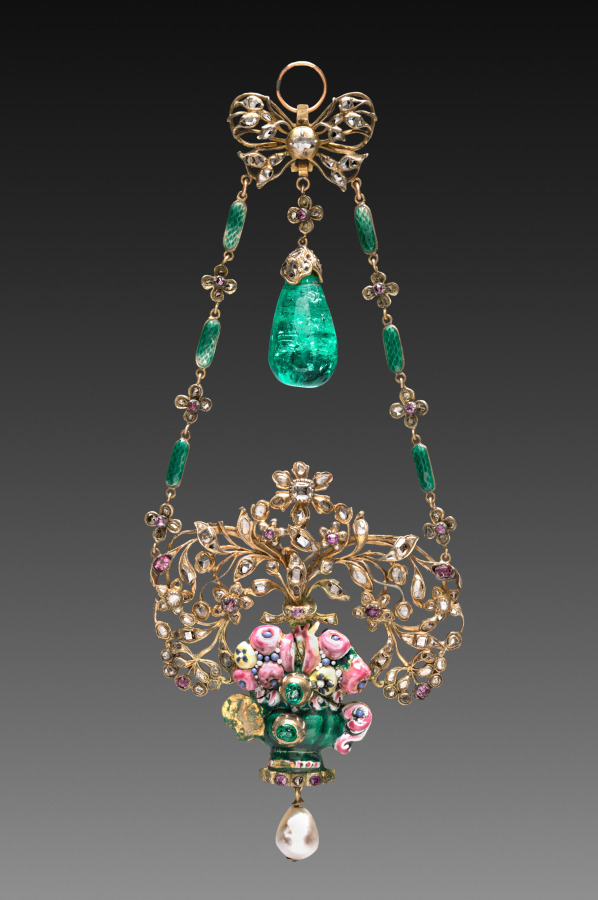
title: Pendant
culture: Continental, 18th century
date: 1700s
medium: metal and enamel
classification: Jewelry